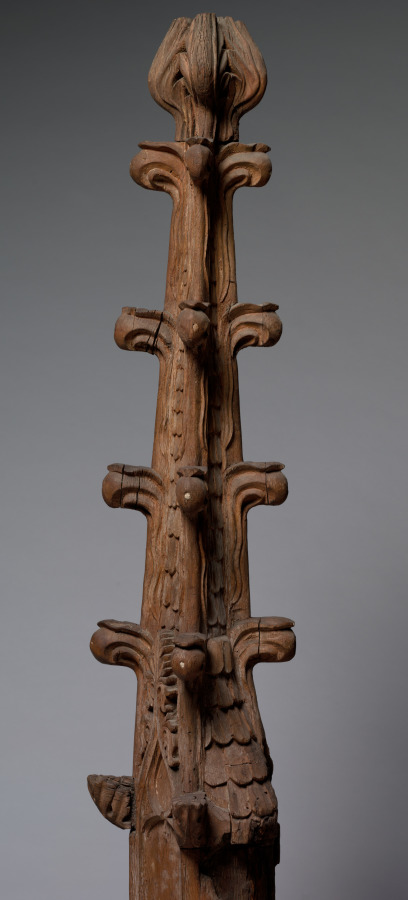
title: Pinnacle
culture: France, 15th century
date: 1400s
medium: oak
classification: Furniture and woodwork